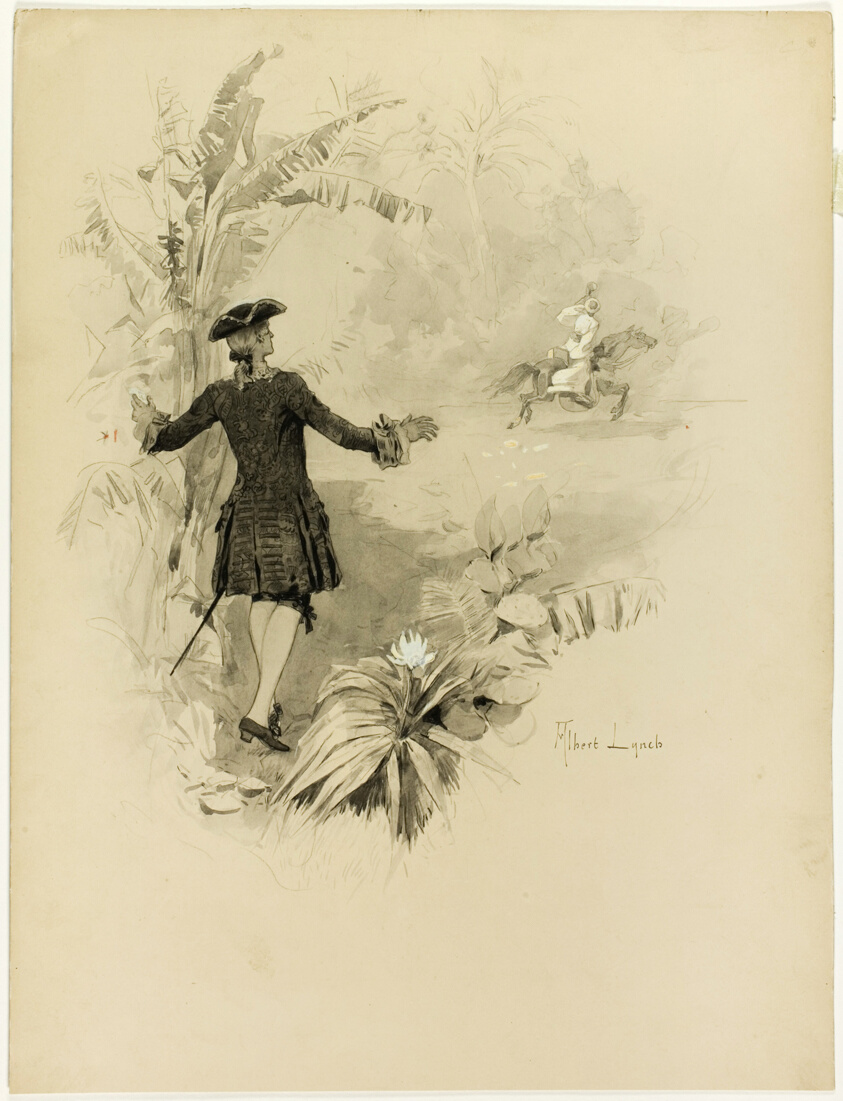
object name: Drawing and Watercolor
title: Study for Illustration for Aline, Queen of Golconda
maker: Albert Lynch (French, born Peru, 1851-after 1900)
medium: Pen and black ink, with brush and black and gray wash, over black chalk, heightened with lead white (discolored), on cream wove card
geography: France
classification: ink or chalk wash; drawings (visual works); prints and drawing